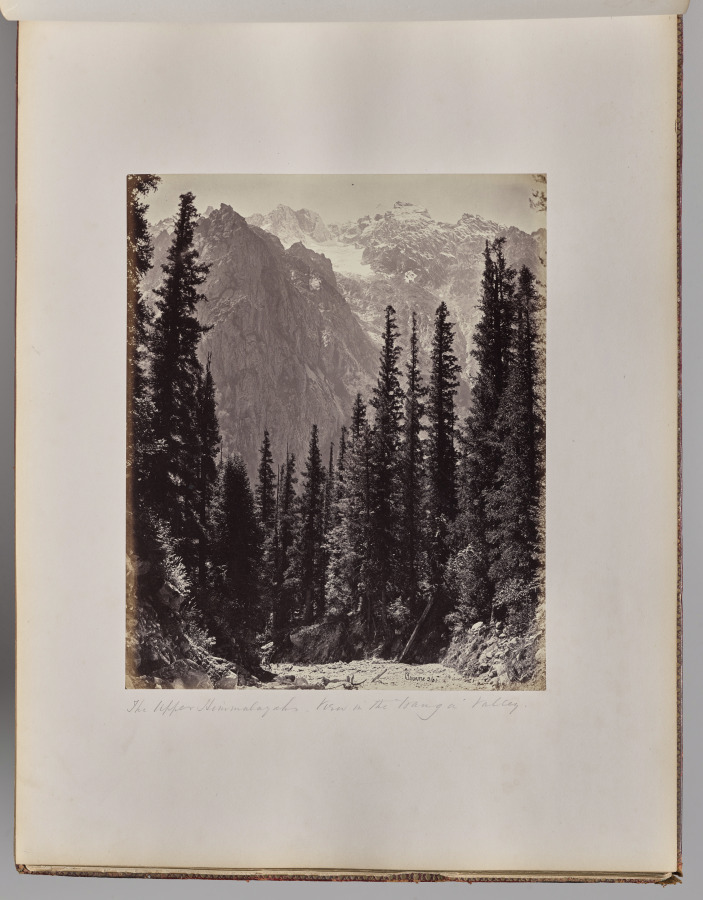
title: The Upper Himmalayahs. View in the Manga Valley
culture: England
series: Photographs of Northern India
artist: Samuel Bourne (British, 1834–1912)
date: 1863–70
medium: albumen print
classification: Photograph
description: The 50 images in this album, all taken in the 1860s, move from the hill towns of the Himalayas down to cities including Lahore (now in Pakistan), Delhi, Lucknow, Agra, Benares (now Varansi), and Calcutta (now Kolkata). Architectural studies of major monuments offer valuable historical records of what sites such as the Taj Mahal and the imperial mosque of the Mughal emperors in Delhi looked like before twentieth-century restorations.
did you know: Samuel Bourne, the author of most the images in this album, was a banker in England before he moved to India to become a professional photographer.